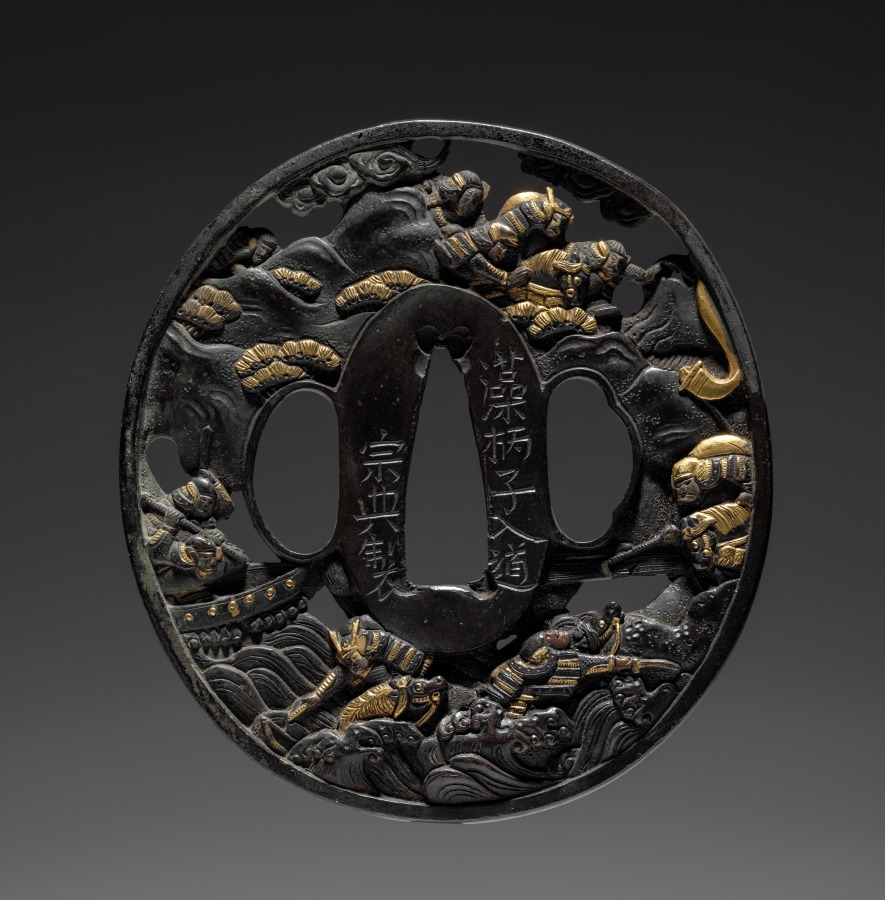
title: Sword Guard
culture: Japan, Edo period (1615–1868)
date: mid-1600s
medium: metal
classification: Arms and Armor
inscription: Signature: Soheishi-nyudo Soten made